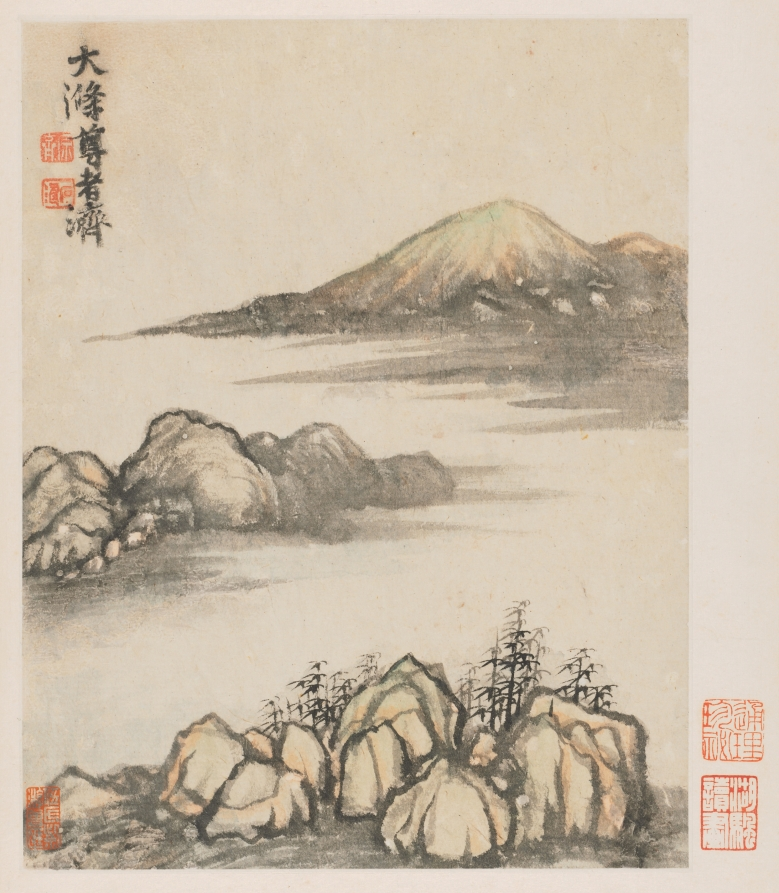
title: Reminiscences of Qinhuai River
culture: China, Qing dynasty (1644-1911)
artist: Shitao (Chinese, 1642–1707)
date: 1642–1707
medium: album leaf, ink and color on Song paper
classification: Painting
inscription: 大滌尊者濟 [印]原濟; 石濤